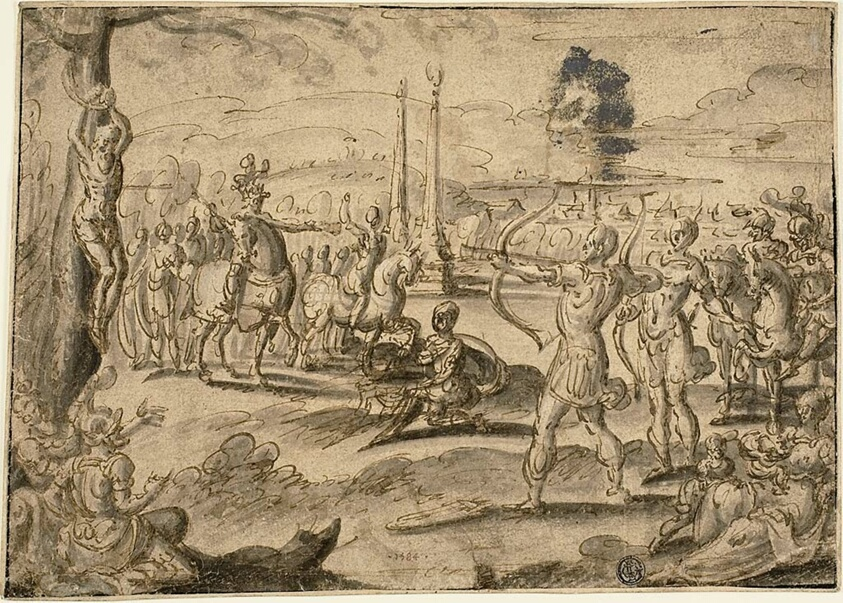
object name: Drawing and Watercolor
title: Shooting at Father's Corpse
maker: Attributed to Marten van Heemskerck; Netherlandish, 1498-1574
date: 1584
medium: Pen and brown ink, with brush and gray wash, on tan laid paper, laid down on card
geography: Netherlands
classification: pen and ink drawings; drawings (visual works); prints and drawing